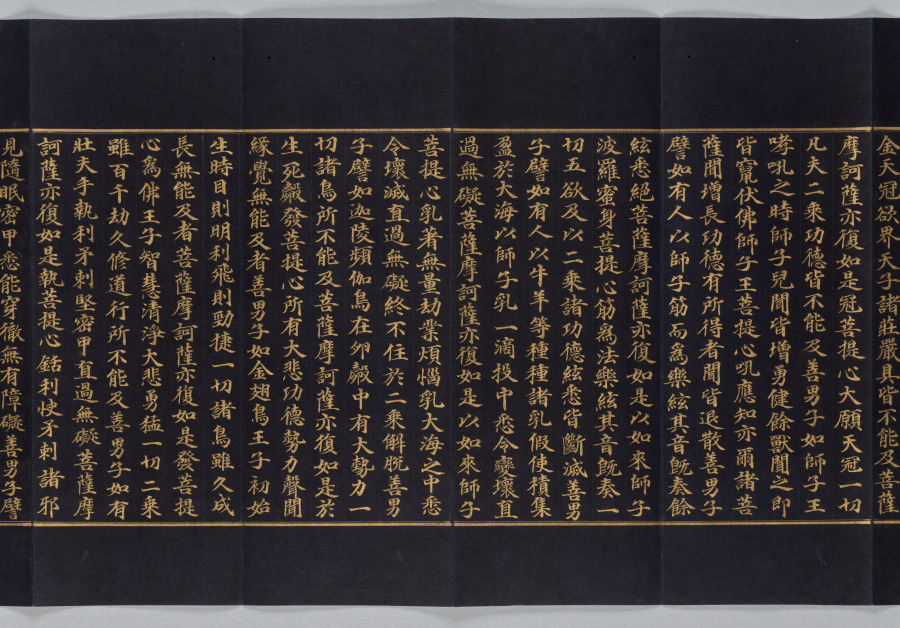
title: Avatamsaka Sutra No. 78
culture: Korea, Goryeo dynasty (918–1392)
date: 1300s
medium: Folded book with illustrated frontispiece; gold and silver on mulberry paper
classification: Bound Volume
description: This illuminated manuscript presents one part of the multivolume sacred text titled Avatamsaka (Flower Garland) sutra. Both the script and the image are rendered in gold ink on the smooth surface of the dark blue, indigo-dyed mulberry paper. This portion of the text, which reads from right to left, describes the encounter of the Buddha of the Future (Maitreya) and the young pilgrim Sudhana. The Buddha gives his words of wisdom to Sudhana, who asks questions about the path toward spiritual awakening. Mixed with ink and glue, the gold has a brilliance that strikingly reflects Sudhana’s ardent quest for understanding the way to reach enlightenment.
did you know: The pristine condition of this manuscript indicates that it was rarely used after its creation, revealing that the act of making a manuscript rather than reading it was the main religious goal.